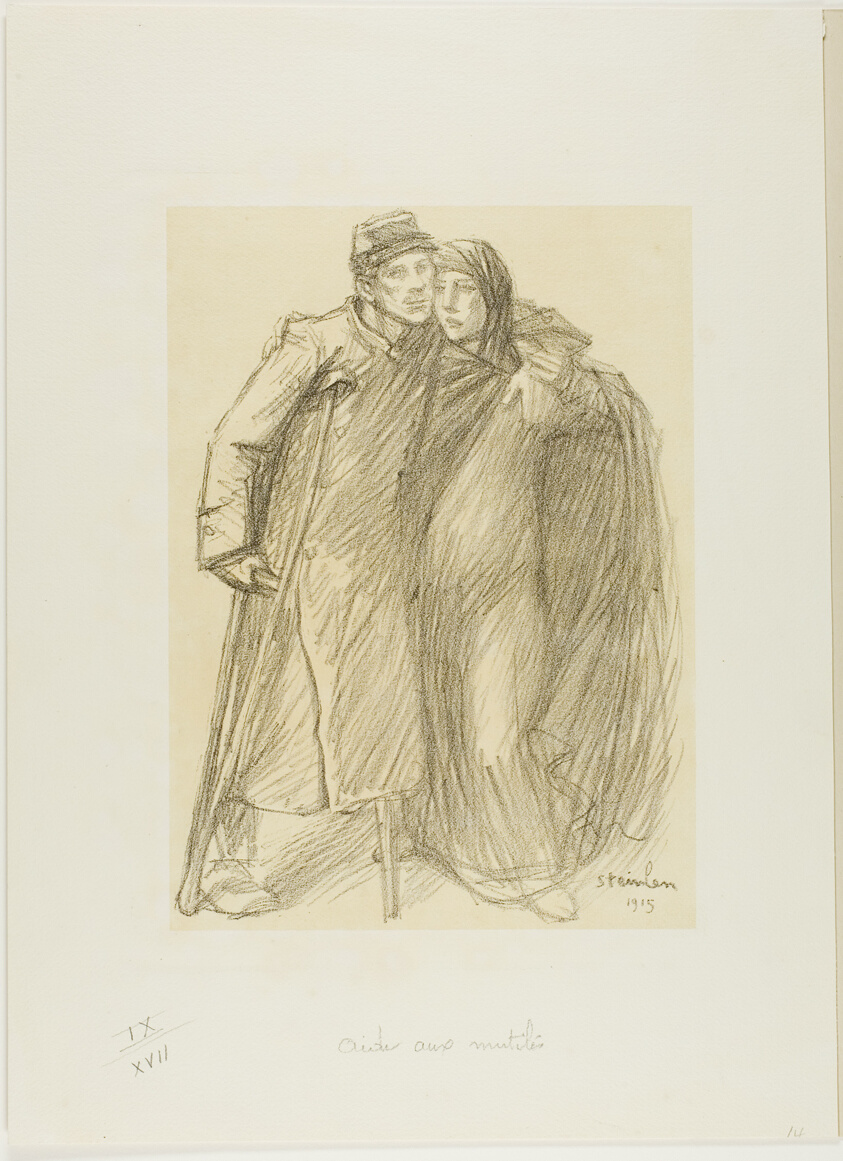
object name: Print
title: Helping the Wounded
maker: Théophile-Alexandre Steinlen; French, born Switzerland, 1859-1923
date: 1915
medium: Lithograph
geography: France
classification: lithograph; print; prints and drawing